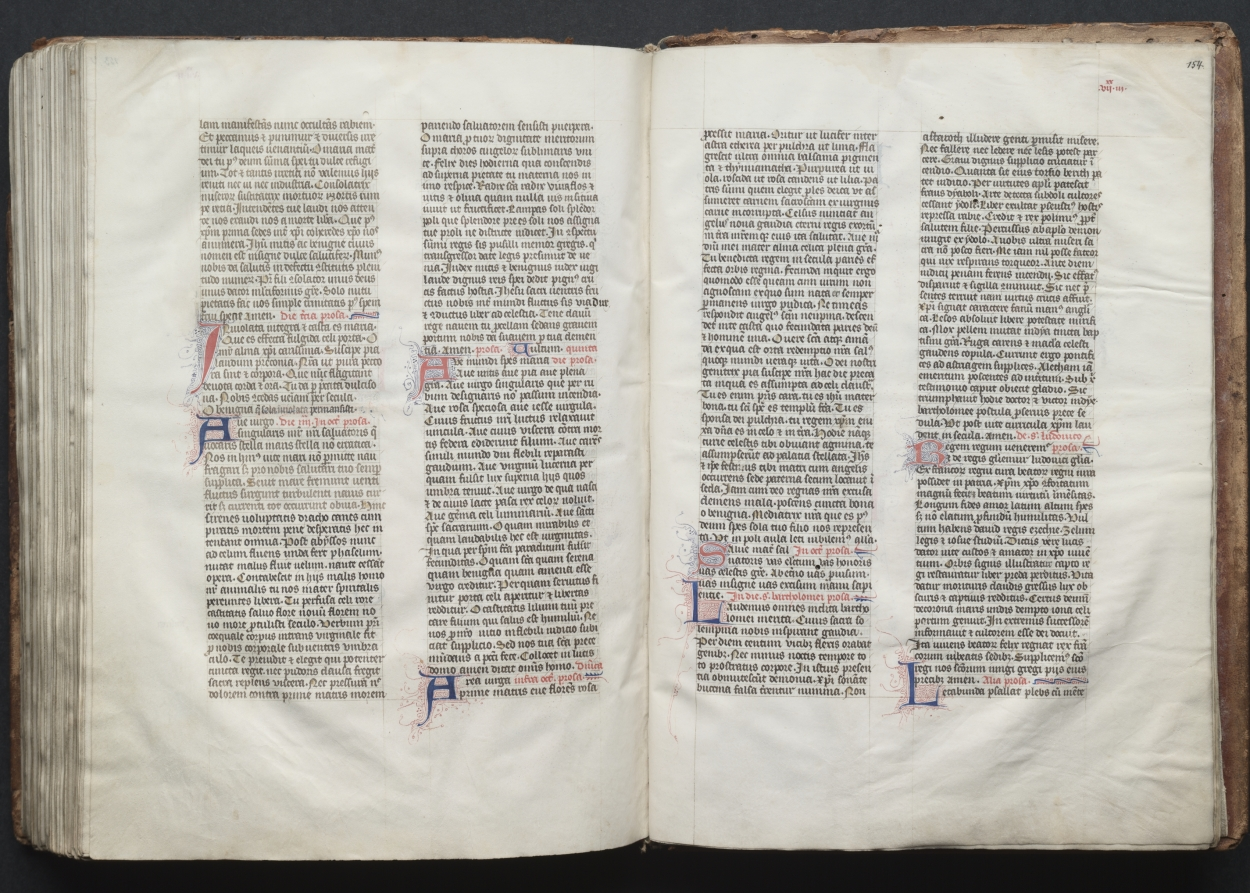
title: The Gotha Missal: Fol. 153v, Text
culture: France, Paris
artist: Master of the Boqueteaux (French)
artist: and Workshop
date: c. 1375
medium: ink, tempera, and gold on vellum; blind-tooled leather binding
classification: Bound Volume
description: The style and quality of this manuscript's decoration is typical of deluxe Parisian books made for aristocratic or royal patrons. Most of the book's decoration appears to be the work of the Master of the Boqueteaux, an artist active at the court of King Charles V (died 1380). His style was apparently shared by a number of book illuminators working in and around Paris. It is very possible that the Gotha Missal belonged to Charles V, but is not provable because the manuscript has no royal portraits and lacks a colophon. Given the book's magnificent decoration, however, it would seem that it was produced for a Valois prince, if not for the king himself. The manuscript receives its name from the German dukes of Gotha, its later owners.